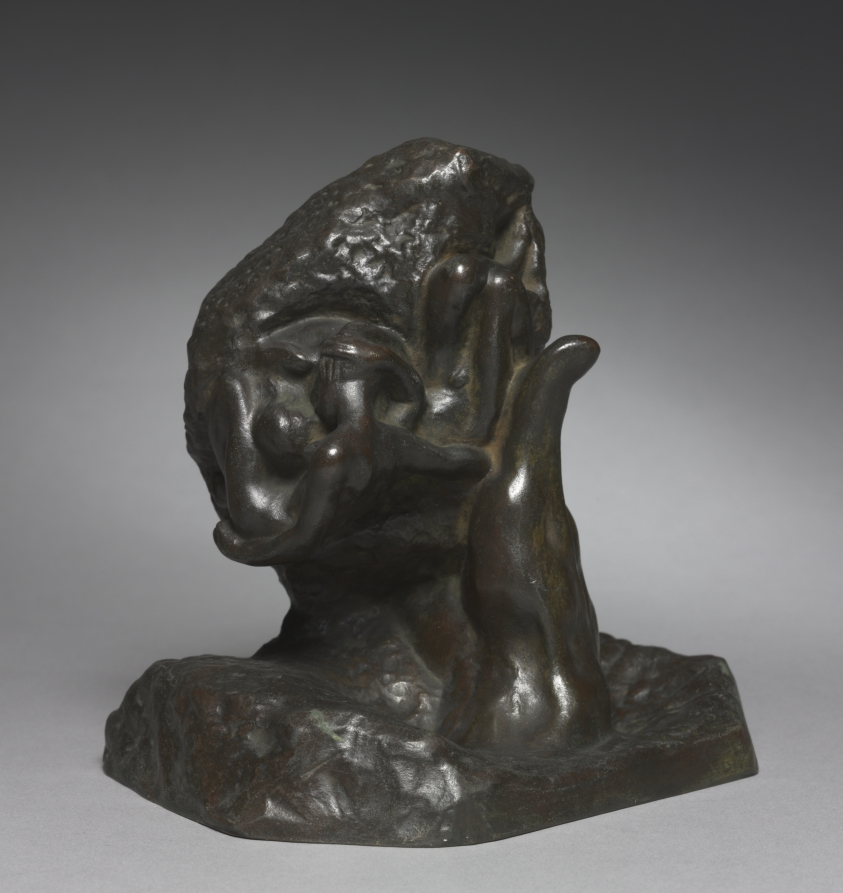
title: The Hand of God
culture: France, late 19th-early 20th Century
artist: Auguste Rodin (French, 1840–1917)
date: c. 1880 – 1917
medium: bronze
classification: Sculpture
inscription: Signed on back and in relief inside the lower base: "A. Rodin"